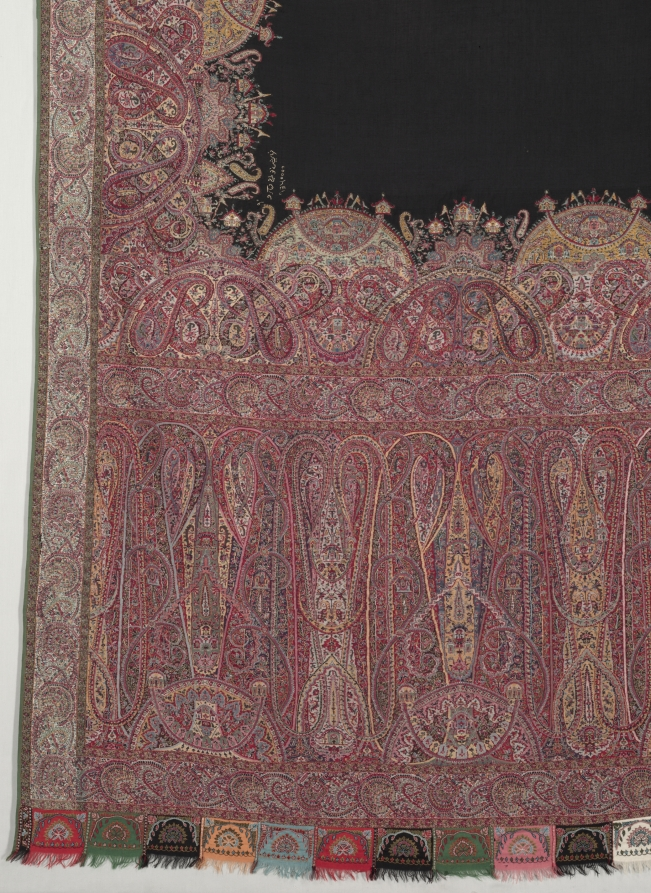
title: Long Shawl with Black Center and Exotic Four-Sided Gallery in Chinoiserie Style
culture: India, Kashmir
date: 1840s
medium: wool; 2/2 twill tapestry (S), double interlocked, pieced, refreshed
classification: Textile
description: This expensive woven shawl has been refreshed—that is, its outdated designs have been replaced with beautiful new decoration. Overlapping pairs of botehs, or paisleys, enliven the original end panels (pallava) whereas the area around the central black rectangle was updated with an exotic four-sided gallery featuring ships, buildings, and flags that suggest Chinese influence. This stunning shawl is composed of seven almost invisibly joined pieces. One large section contains both ends and the continuous side borders while six pieces create the space in the middle. When the shawl was refreshed with the new chic gallery, black pigment—hardly visible—was applied along the edges of the central black section. The inscription may identify the textile’s quality or material content.